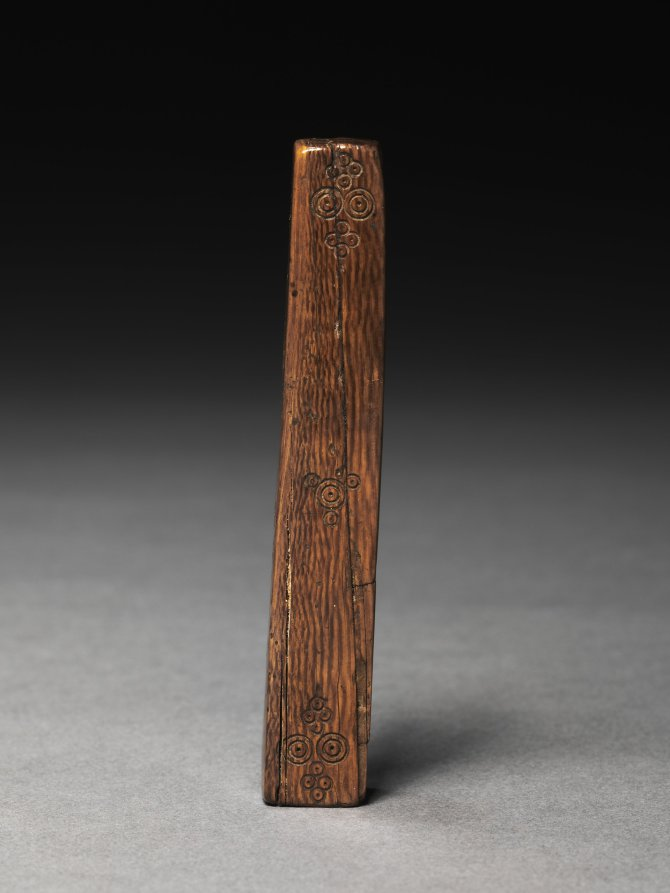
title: Talus or Die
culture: Egypt, Greco-Roman period (332 BCE–395 CE), Roman empire (30 BCE–395 CE)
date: 30 BCE–395 CE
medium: ivory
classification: Implements